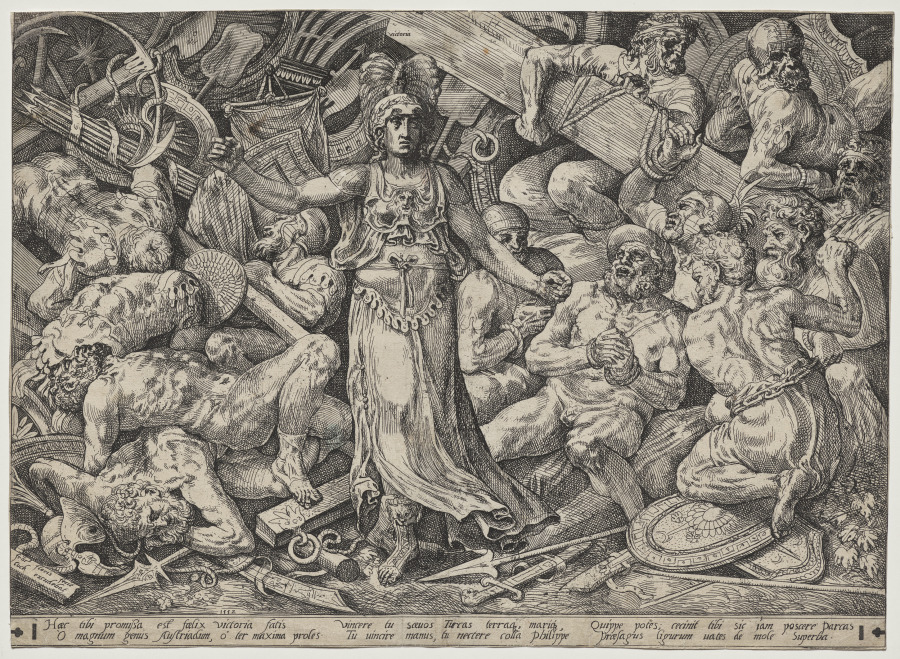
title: Victory Surrounded by Prisoners and Trophies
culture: Netherlands, 16th century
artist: Frans Floris the Elder (Flemish, 1509–1570)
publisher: Hieronymus Cock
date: 1552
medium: etching with engraving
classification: Print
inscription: Unidentified collector’s mark (Lugt 4073), verso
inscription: 3 illegible graphite inscriptions, verso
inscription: In plate, in image lower left recto: “Fra floris fecit / Cock excudubat / 1552”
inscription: Latin verses below image recto: “Haec tibi promisa….de mole Superba.”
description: In Victory Surrounded by Prisoners and Trophies, Frans Floris portrayed a standing female figure in the center, the personification of Victory, surrounded by a multitude of nudes and trophies (or spoils of war), which she has vanquished. The nudes were inspired by Roman friezes as well as figures that Floris had studied on Michelangelo’s Sistine Chapel frescoes during an extended trip to Italy in the 1540s. The etching is based on a painted composition (now lost) that Floris made a few years earlier to adorn a triumphal arch, one of numerous ephemeral arches featured in festive decorations throughout the city mounted for the visit of Charles V and the future Philip II in 1549.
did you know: This is the only etching that the Northern Renaissance painter Frans Floris ever made.